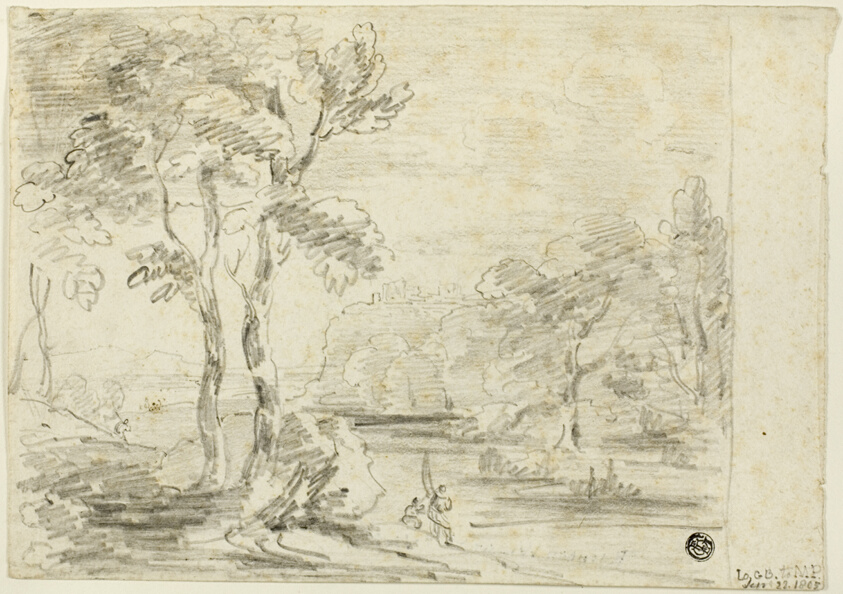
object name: Drawing and Watercolor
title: Arcadian Landscape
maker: Possibly Sir George Howland Beaumont (English, 1753-1827); or Richard Wilson (English, 1714-1782)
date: 1805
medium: Black crayon on ivory wove paper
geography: England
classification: crayon; drawings (visual works); prints and drawing